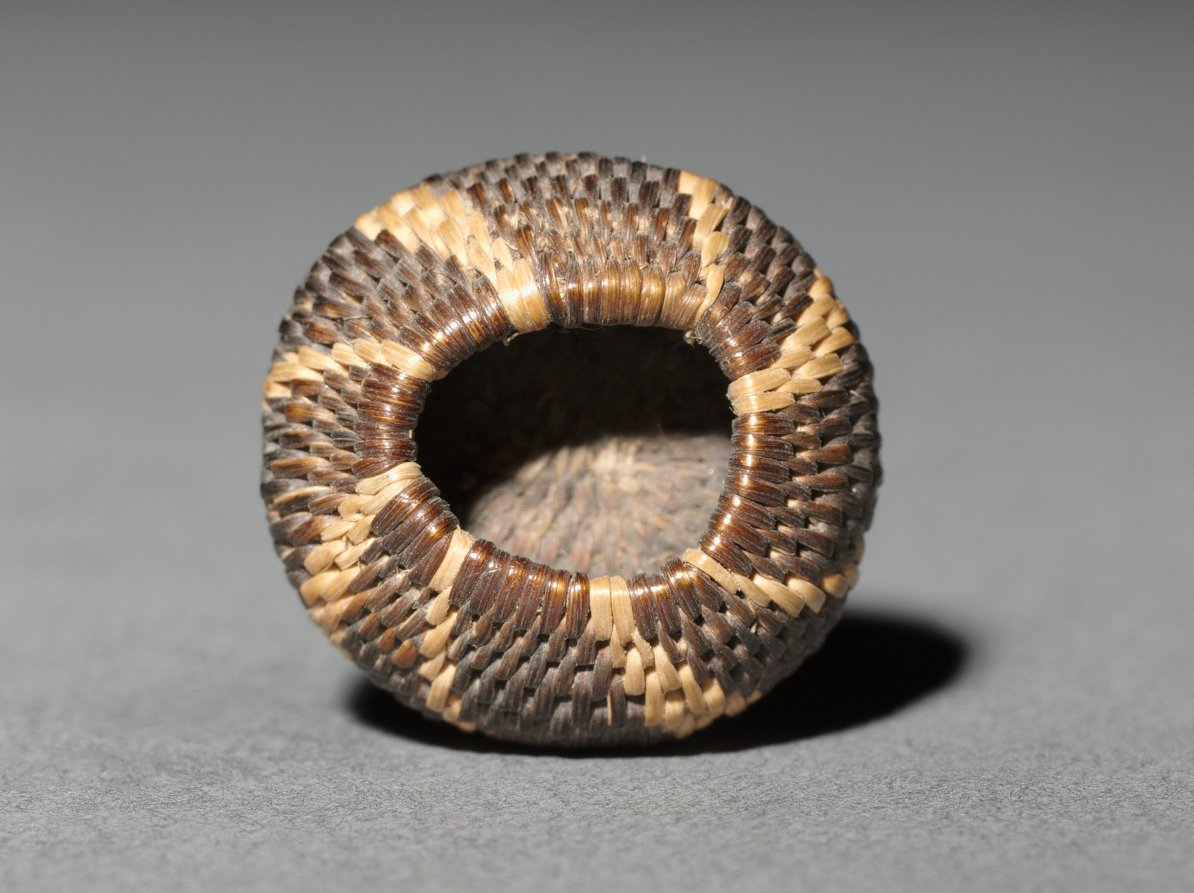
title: Miniature Basket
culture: America, Native North American, Southwest, Arizona, Akimel O'odham (Pima), Unassigned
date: before 1923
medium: plant fiber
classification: Basketry